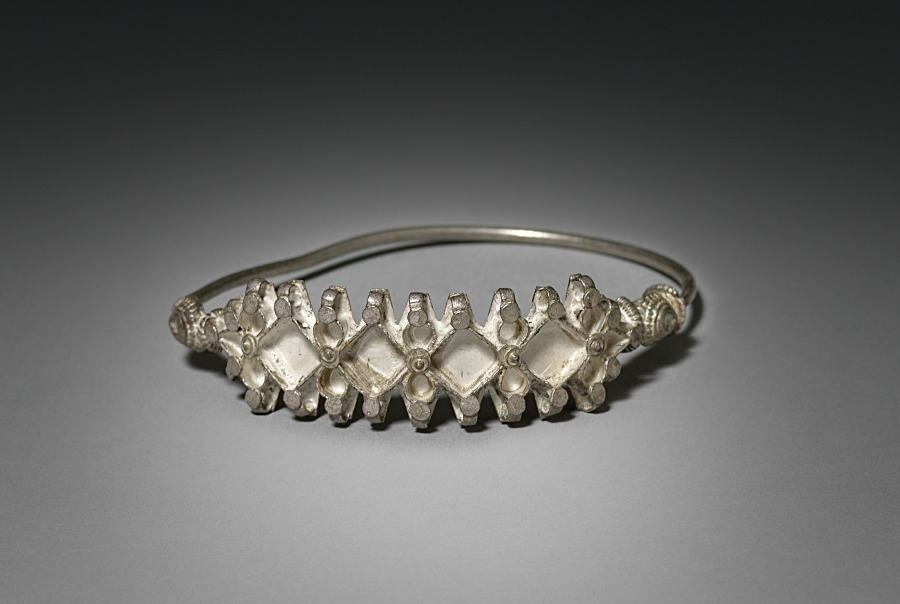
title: Nose Ring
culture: India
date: early 1900s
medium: silver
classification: Jewelry